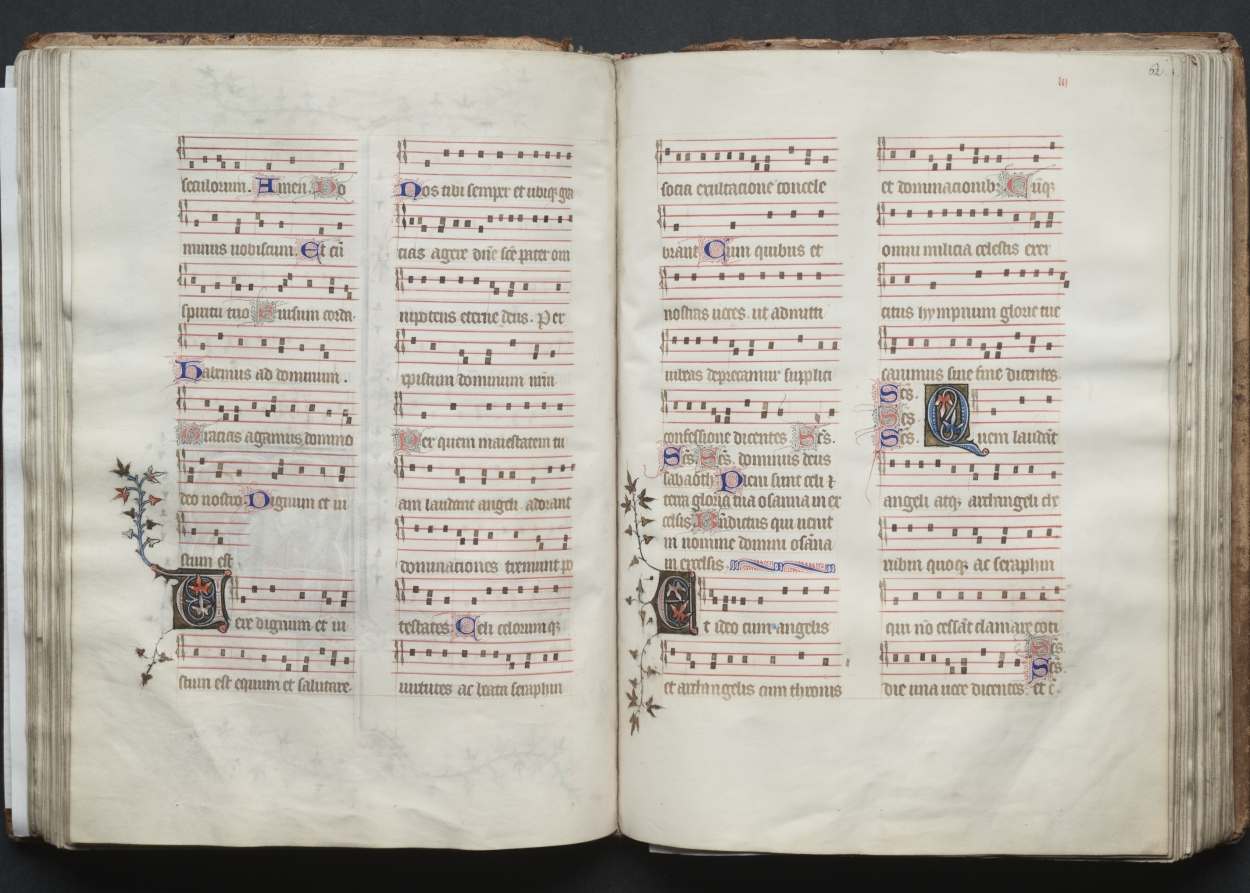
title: The Gotha Missal: Fol. 61v, Text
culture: France, Paris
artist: Master of the Boqueteaux (French)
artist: and Workshop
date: c. 1375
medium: ink, tempera, and gold on vellum; blind-tooled leather binding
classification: Bound Volume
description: The style and quality of this manuscript's decoration is typical of deluxe Parisian books made for aristocratic or royal patrons. Most of the book's decoration appears to be the work of the Master of the Boqueteaux, an artist active at the court of King Charles V (died 1380). His style was apparently shared by a number of book illuminators working in and around Paris. It is very possible that the Gotha Missal belonged to Charles V, but is not provable because the manuscript has no royal portraits and lacks a colophon. Given the book's magnificent decoration, however, it would seem that it was produced for a Valois prince, if not for the king himself. The manuscript receives its name from the German dukes of Gotha, its later owners.